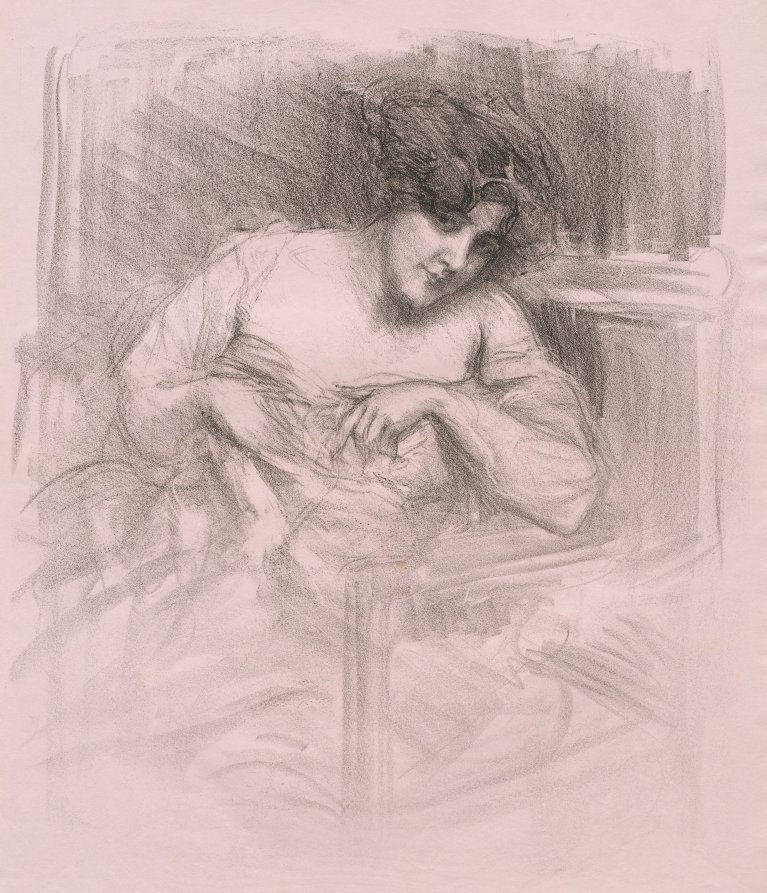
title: Flirt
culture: England, 20th century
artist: Albert de Belleroche (British, 1864–1944)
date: 1907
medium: lithograph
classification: Print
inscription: Lower margin, in graphite: 480; verso: lower margin: M98091811 (in graphite); verso: lower margin: Elizabeth Shearer's collector's stamp, in black ink